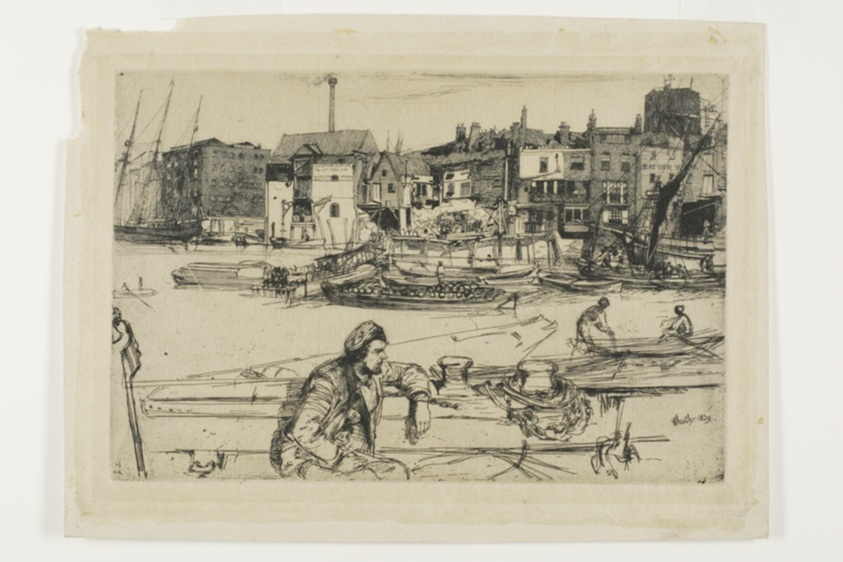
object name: Print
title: Black Lion Wharf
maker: James McNeill Whistler (American, 1834-1903)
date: 1859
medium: Etching with foul biting in black ink on cream Japanese paper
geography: United States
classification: etching; foul biting; print; prints and drawing; paper